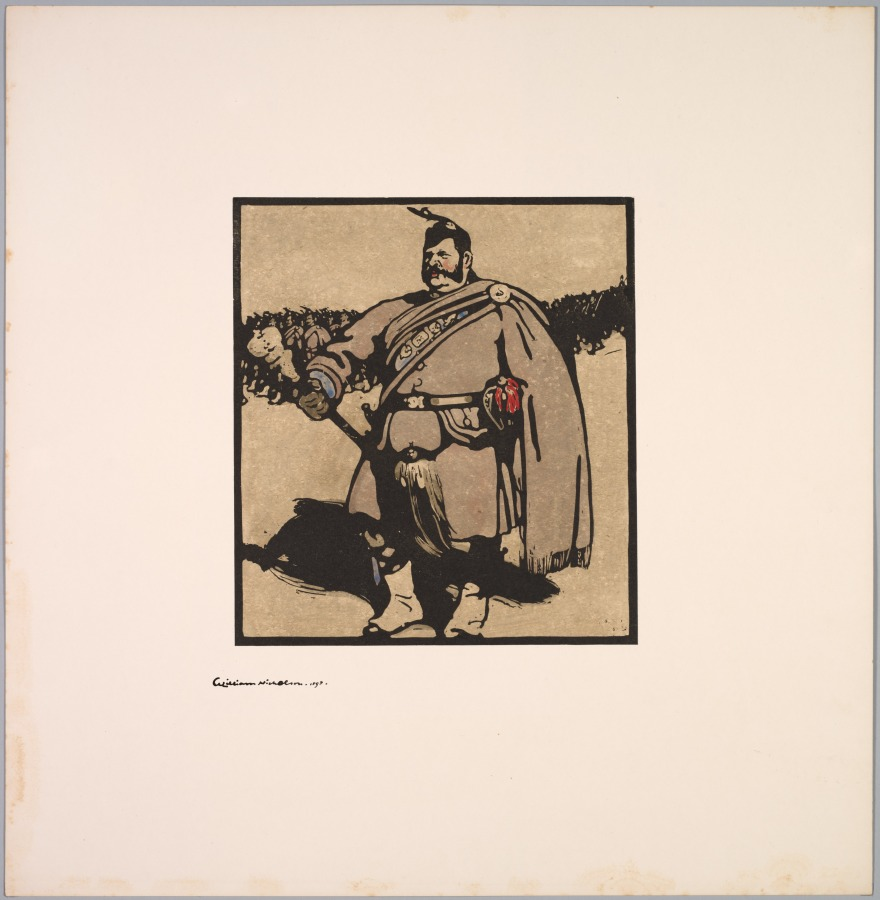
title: London Types: Drum-Major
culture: England, 19th century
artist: William Nicholson (British, 1872–1949)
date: 1898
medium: woodcut hand-colored with watercolor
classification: Print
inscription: lower left margin, in black ink: William Nicholson - 1898 -